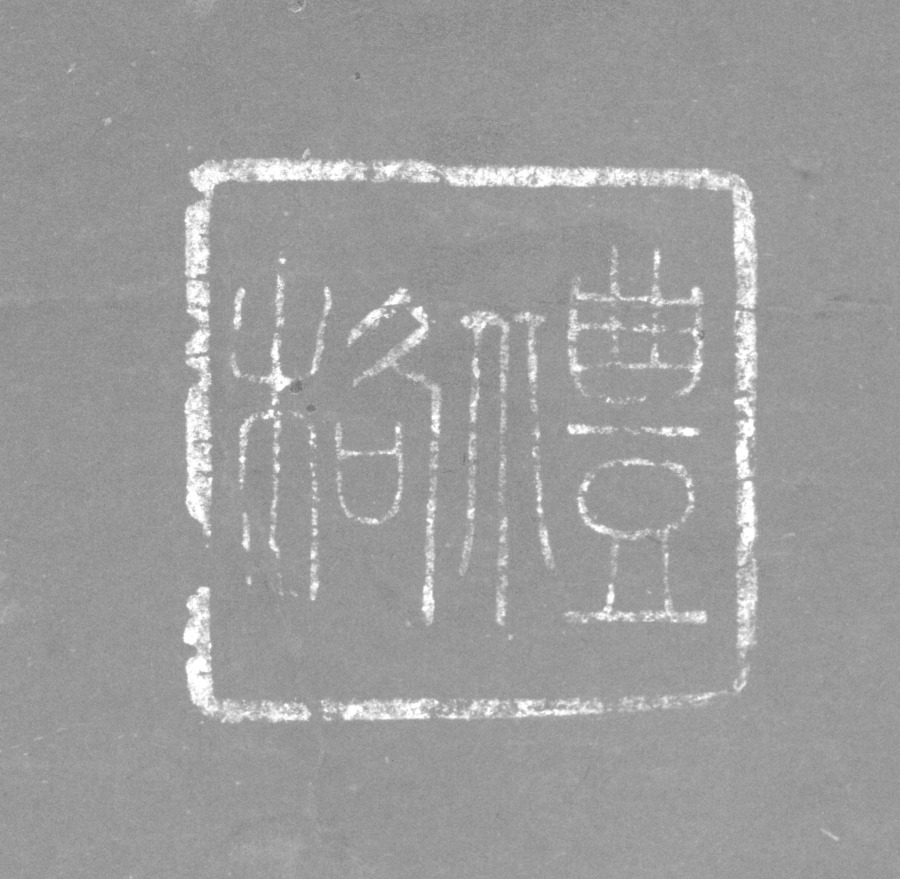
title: Sparrows and Bamboo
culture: Japan, Muromachi period (1392–1573)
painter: Shiken Saidō (Japanese, 1486–1581)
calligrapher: calligraphy by Ekkei Reikaku (Japanese, d. 1609)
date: mid- to late 1500s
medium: hanging scroll; ink on paper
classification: Painting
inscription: signed: Ekkei Reikaku daishi owaru inscription sealed: Reikaku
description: Shiken Saidō, whose style name was Ze'an, was a Zen monk who trained at Shōkokuji temple in Kyoto, and designed the garden of Reiun’in at Myōshinji temple. He painted landscapes in the style of painter and art advisor to the shogun, Sōami (died 1525), as well as bird-and-flower compositions. A poetic inscription by the monk Ekkei Reikaku accompanies this gentle composition of two sparrows perched on bamboo.